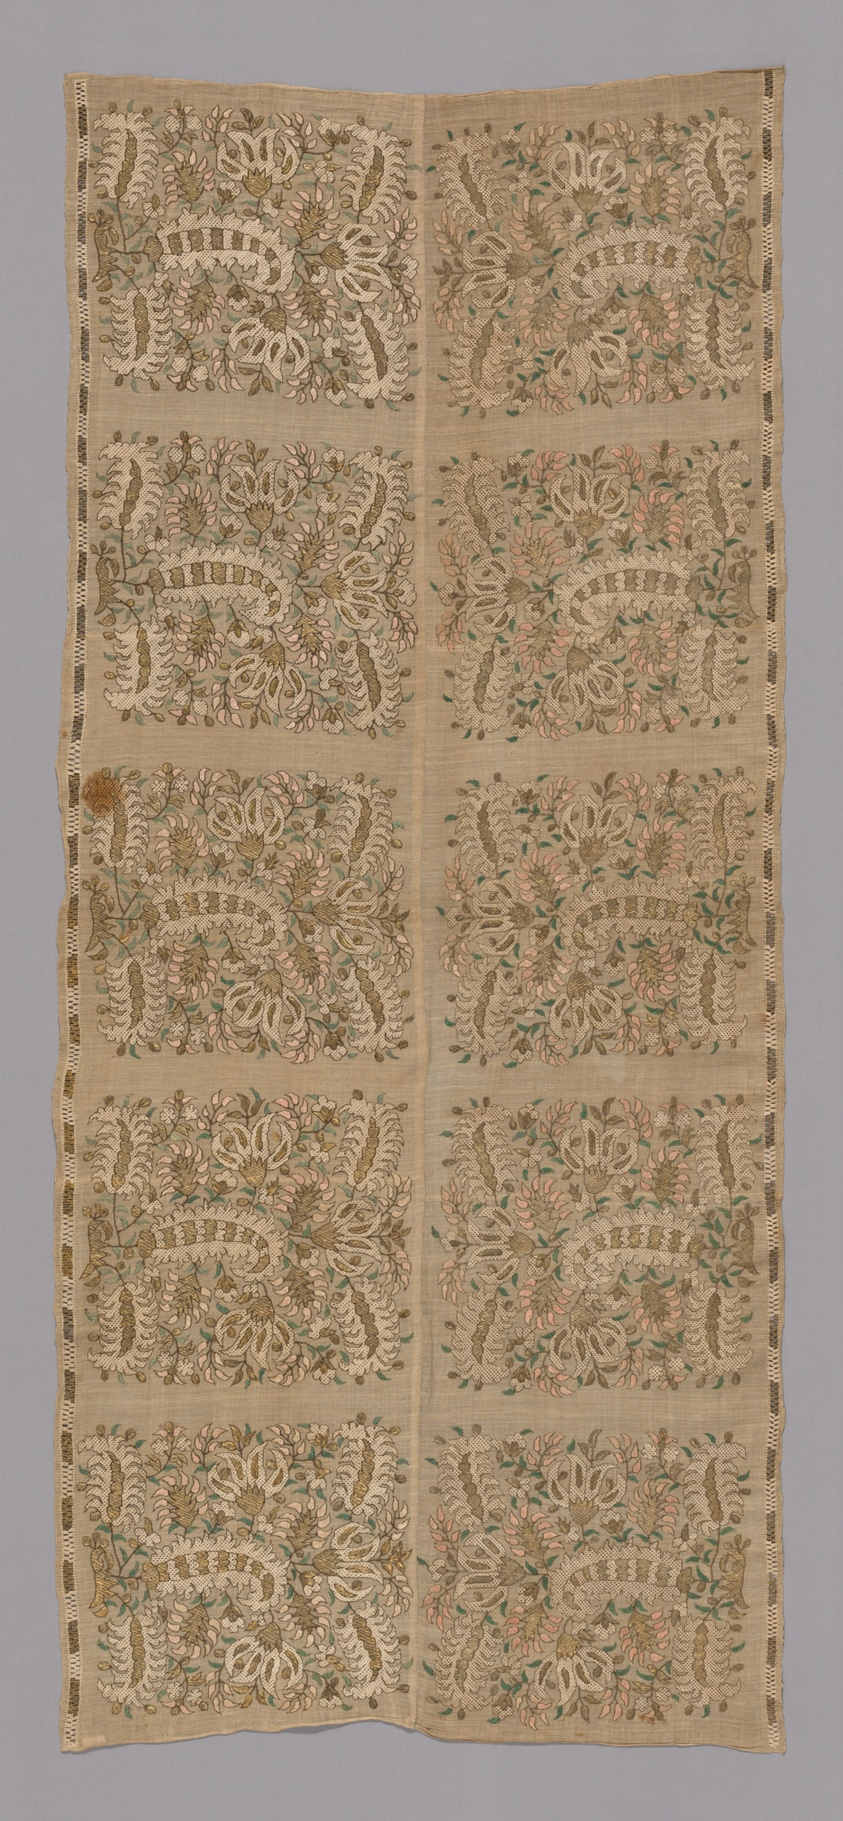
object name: Textile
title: Two Borders Joined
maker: Turkey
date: 19th century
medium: Linen, plain weave; pulled thread work embroidered with linen, silk, and gilt-metal-strip-wrapped silk in hem and overcast stitches; cut and drawn work embroidered in darning and hem stitches; selvages present at top and bottom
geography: Turkey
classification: textile; needlework (visual works)